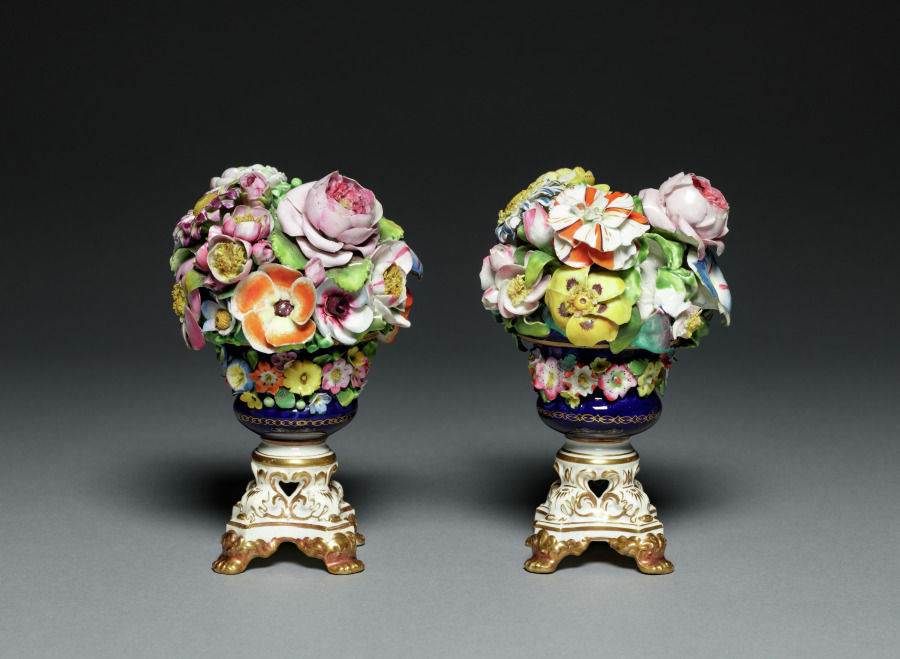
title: Flower Pot and Flowers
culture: England, Derby, 19th century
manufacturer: Derby Porcelain Factory (Bloor Period) (British)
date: 1811–1848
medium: artificial porcelain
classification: Ceramic